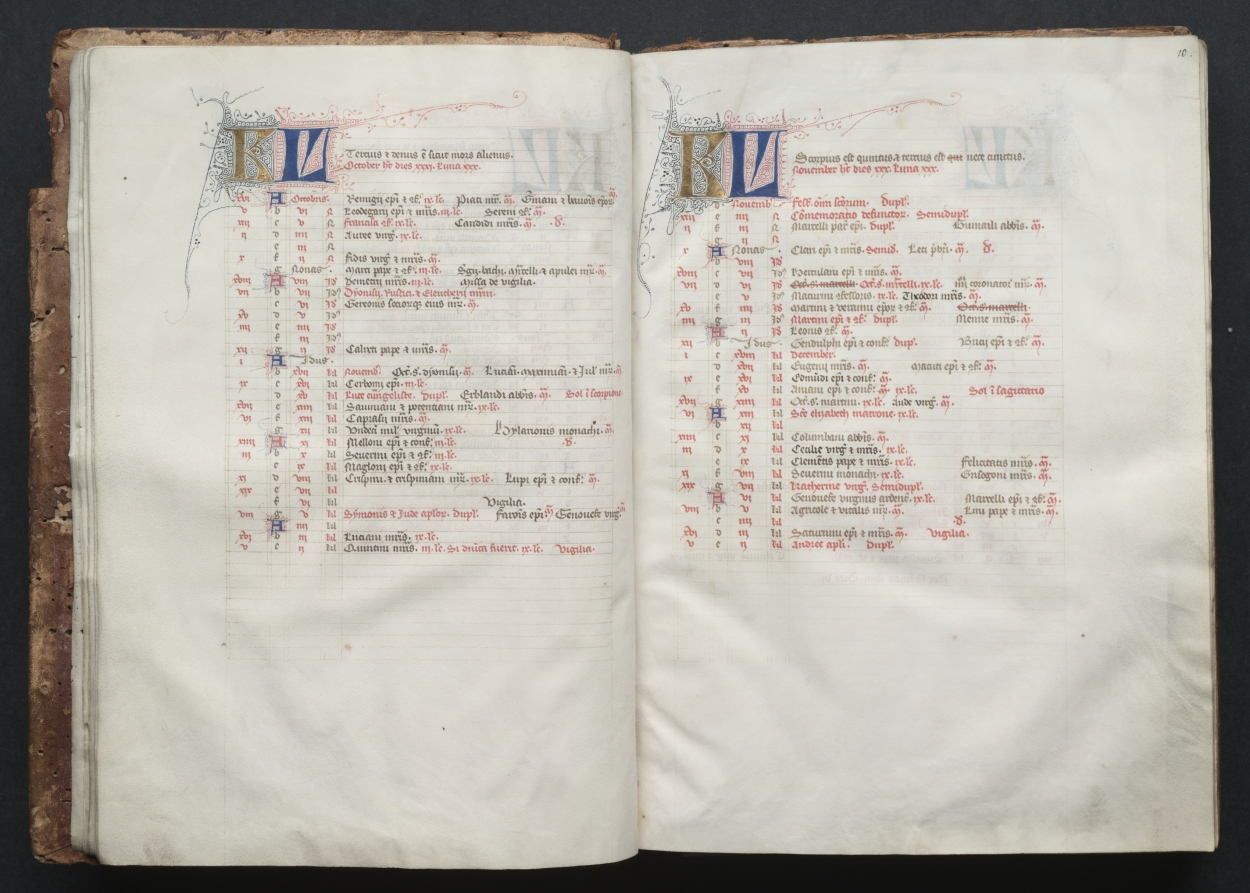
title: The Gotha Missal: Fol. 10r, Text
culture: France, Paris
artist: Master of the Boqueteaux (French)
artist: and Workshop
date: c. 1375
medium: ink, tempera, and gold on vellum; blind-tooled leather binding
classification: Bound Volume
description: The style and quality of this manuscript's decoration is typical of deluxe Parisian books made for aristocratic or royal patrons. Most of the book's decoration appears to be the work of the Master of the Boqueteaux, an artist active at the court of King Charles V (died 1380). His style was apparently shared by a number of book illuminators working in and around Paris. It is very possible that the Gotha Missal belonged to Charles V, but is not provable because the manuscript has no royal portraits and lacks a colophon. Given the book's magnificent decoration, however, it would seem that it was produced for a Valois prince, if not for the king himself. The manuscript receives its name from the German dukes of Gotha, its later owners.